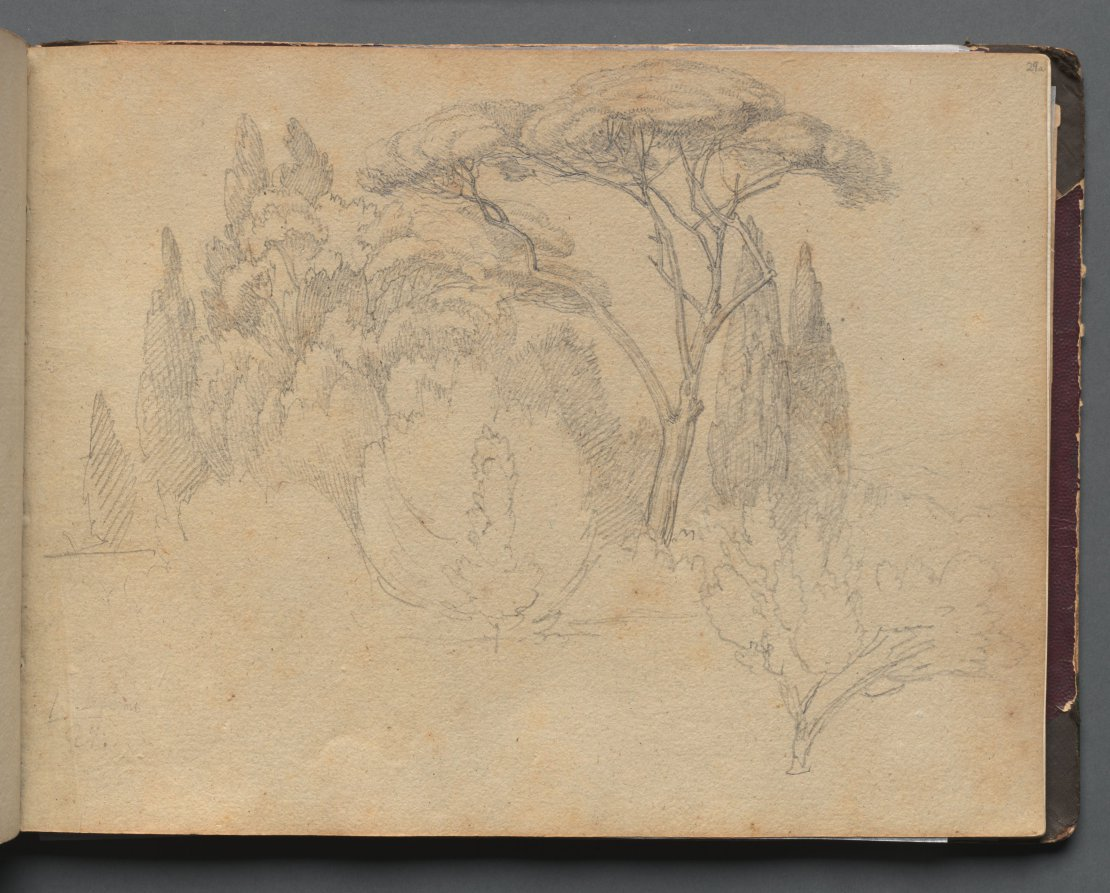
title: Album with Views of Rome and Surroundings, Landscape Studies, page 29a: Landscape Study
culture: Germany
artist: Franz Johann Heinrich Nadorp (German, 1794–1876)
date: c. 1830s-70s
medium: graphite on brown paper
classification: Bound Volume